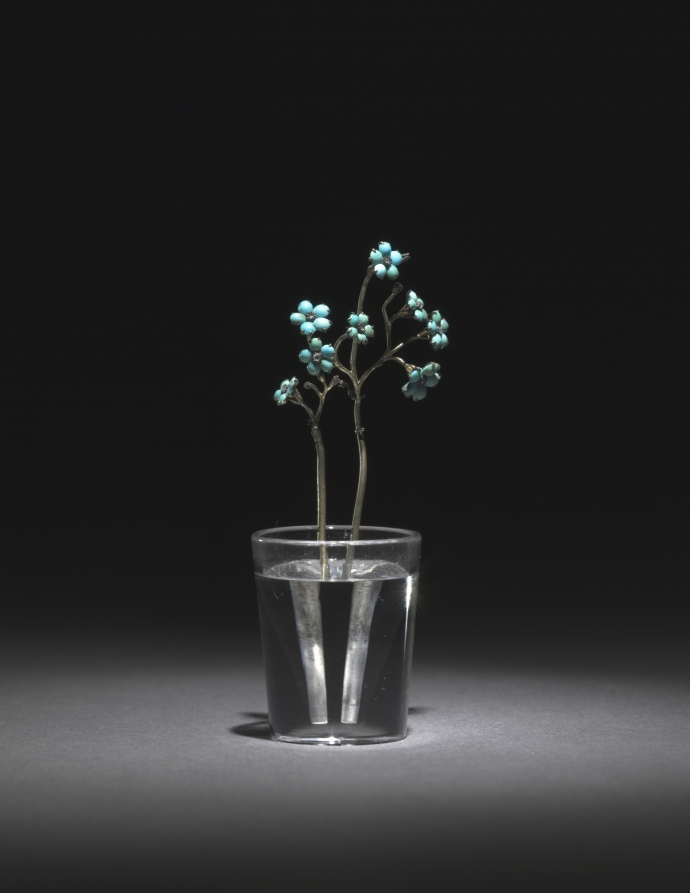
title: Flower Study of Forget-Me-Nots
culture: Russia, St. Petersburg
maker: House of Fabergé (Russian, 1842–1918)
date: c. 1885–1915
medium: turquoise, diamonds, rock crystal, silver gilt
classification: Miscellaneous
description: These delicate flowers, resembling a bouquet of forget-me-nots, are composed of finely rounded turquoise stones set around rose-cut diamonds on silver-gilt stems placed in rock crystal pots. Fabergé’s inspiration for his flower studies is said to have come from the floral brooches of precious stones that were made in the 1700s for Catherine the Great as well as from the Japanese art of flower arranging, known as ikebana. Fabergé’s flower studies were given as intimate gifts to friends by the tsarina and others in the court. She also liked to take them around to wherever the imperial family was residing as a reminder of spring during the harsh Russian winters.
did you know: The stems of Fabergé’s flower studies are set into little basins carved from rock crystal to resemble pots of water.